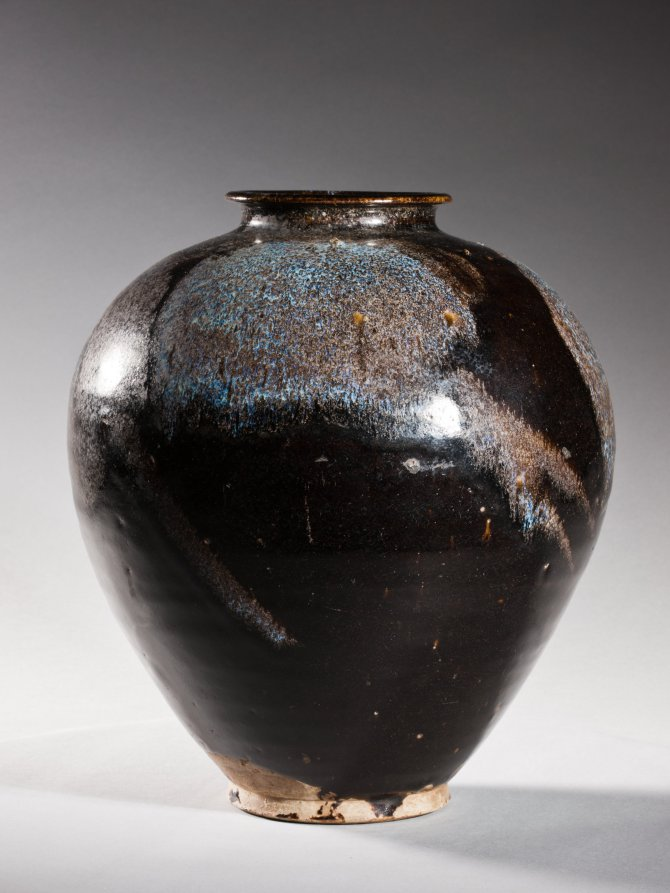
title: Jar: Black Ware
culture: China, Henan province, Huangdao kilns, Tang dynasty (618-907)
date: 700s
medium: glazed stoneware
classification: Ceramic